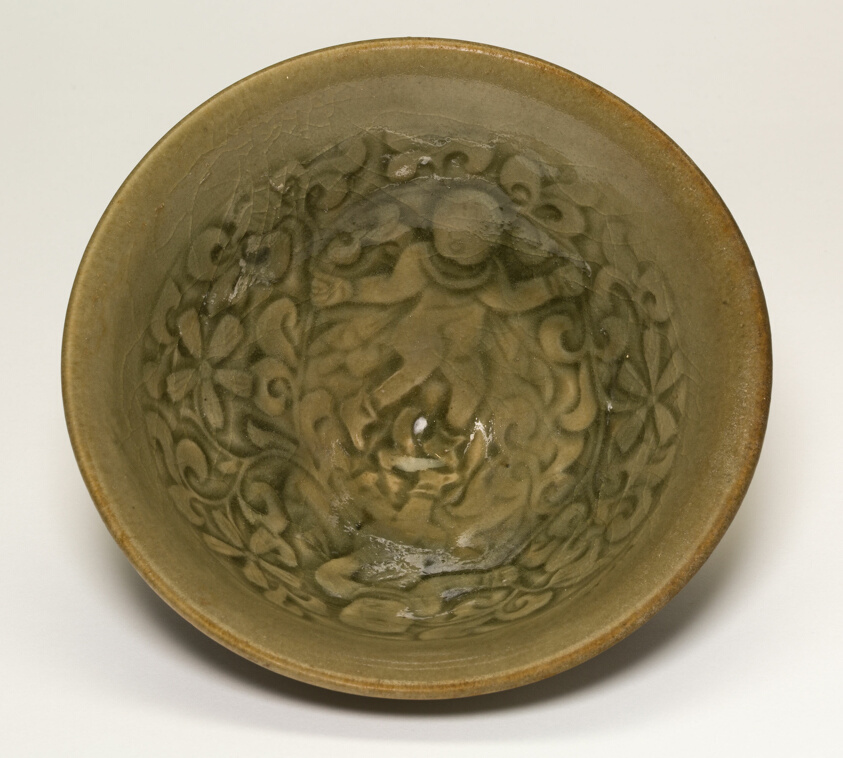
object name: Vessel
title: Cup with Children among Scrolling Vines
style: Chinese (culture or style)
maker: China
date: Jin dynasty (1115–1234), 12th/13th century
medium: Yaozhou ware; celadon-glazed stoneware with underglaze mold-impressed decoration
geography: China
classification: drinking vessel; stoneware; asian art; ceramics; vessel